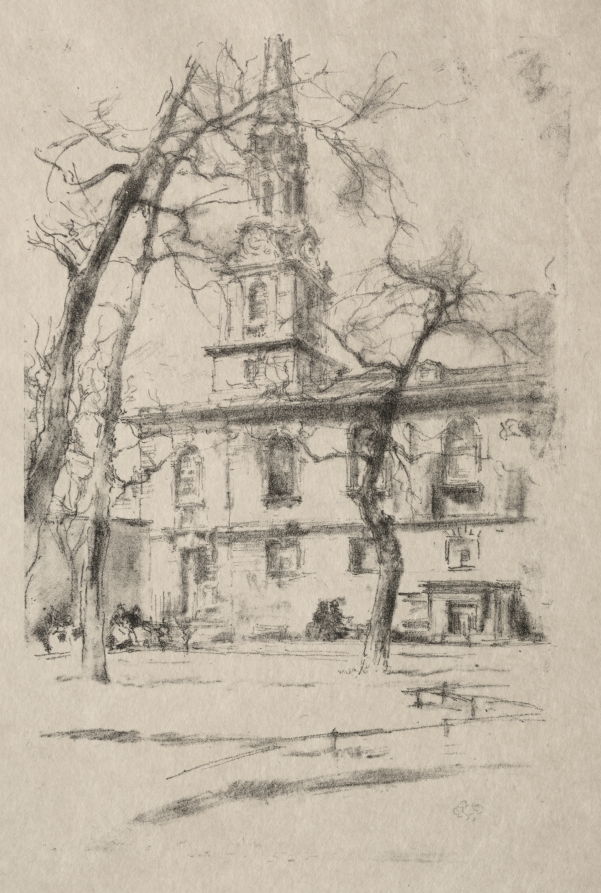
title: St. Giles-in-the-Fields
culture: America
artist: James McNeill Whistler (American, 1834–1903)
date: 1896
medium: lithograph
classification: Print